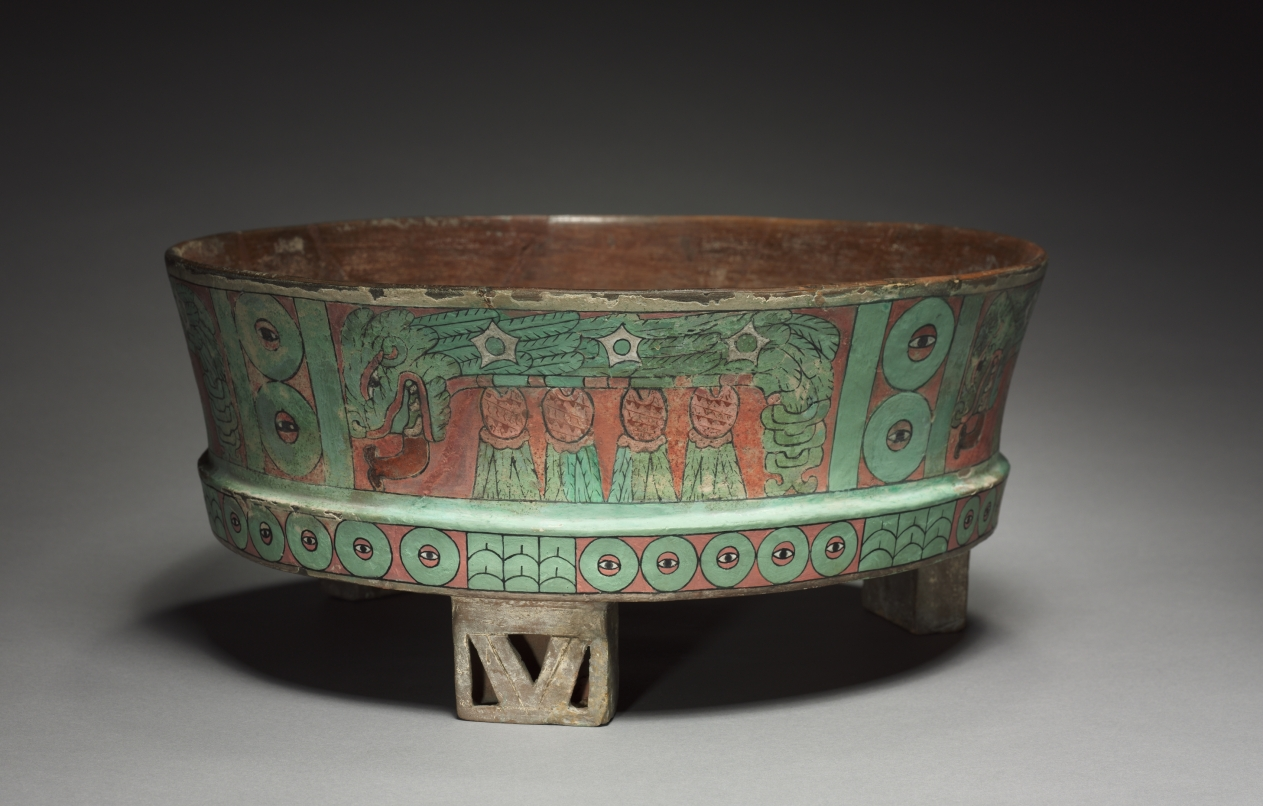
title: Basin with Feathered Serpent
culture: Central Mexico, Teotihuacán style, Classic period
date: 400–550 CE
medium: earthenware, stucco, pigment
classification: Ceramic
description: The serpent covered with the green feathers of the tropical quetzal bird is an image of verdant, bountiful nature and life. It also may be a symbol of rulership, thus linking rulers to cosmic forces and the natural order. Four human hearts lie beneath the serpent on this unusually large basin, suggesting that sacrifice stimulates nature’s fruitfulness.